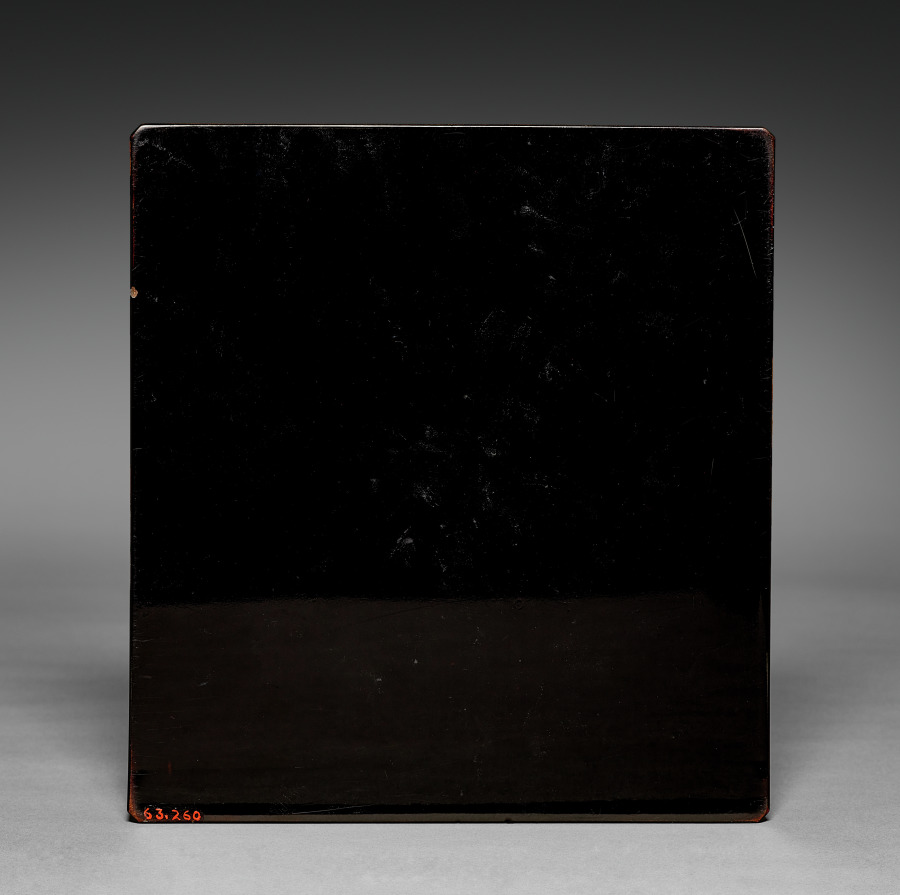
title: Writing Box with Spitting Courtesan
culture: Japan, Edo period (1615–1868)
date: early to mid-1800s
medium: Lacquered wood with maki-e (image made of sprinkled gold dust)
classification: Lacquer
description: The design on this writing box shows a courtesan who has just completed an impressive feat of spitting the term shinobukoi (忍恋), which could be translated as “hidden love” or “unrequited love,” on an earthen wall. The phrase appeared in classical Japanese poetry anthologies produced by nobles writing in ink on the finest decorated papers. Here, the confining walls of the brothel district become a space for public announcement in graffiti, with the medium being perhaps tea.